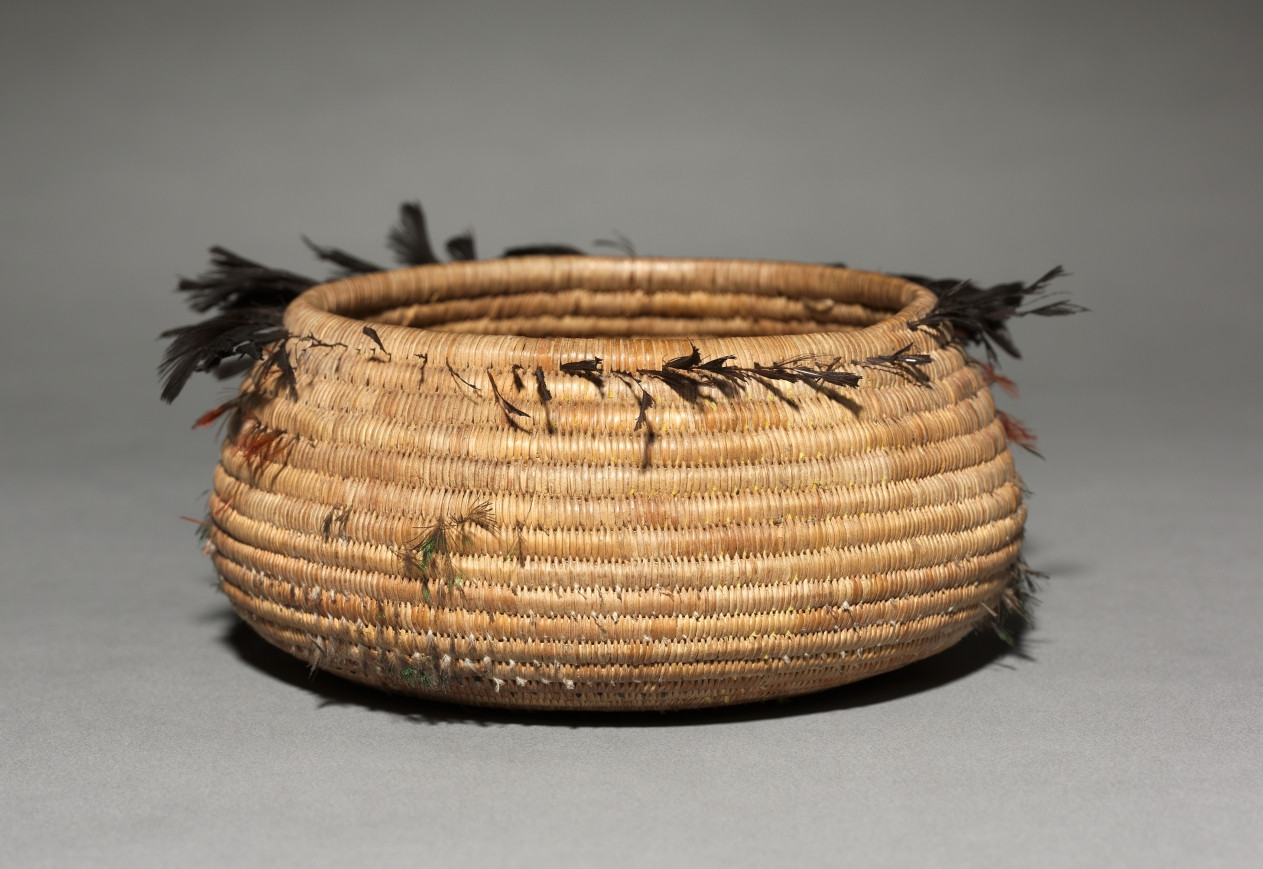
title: Gift Bowl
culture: California, Pomo, Eastern, Late 19th- Early 20th century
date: 1900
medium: Sedgw with Feathers; Coiled (3 rods)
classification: Basketry